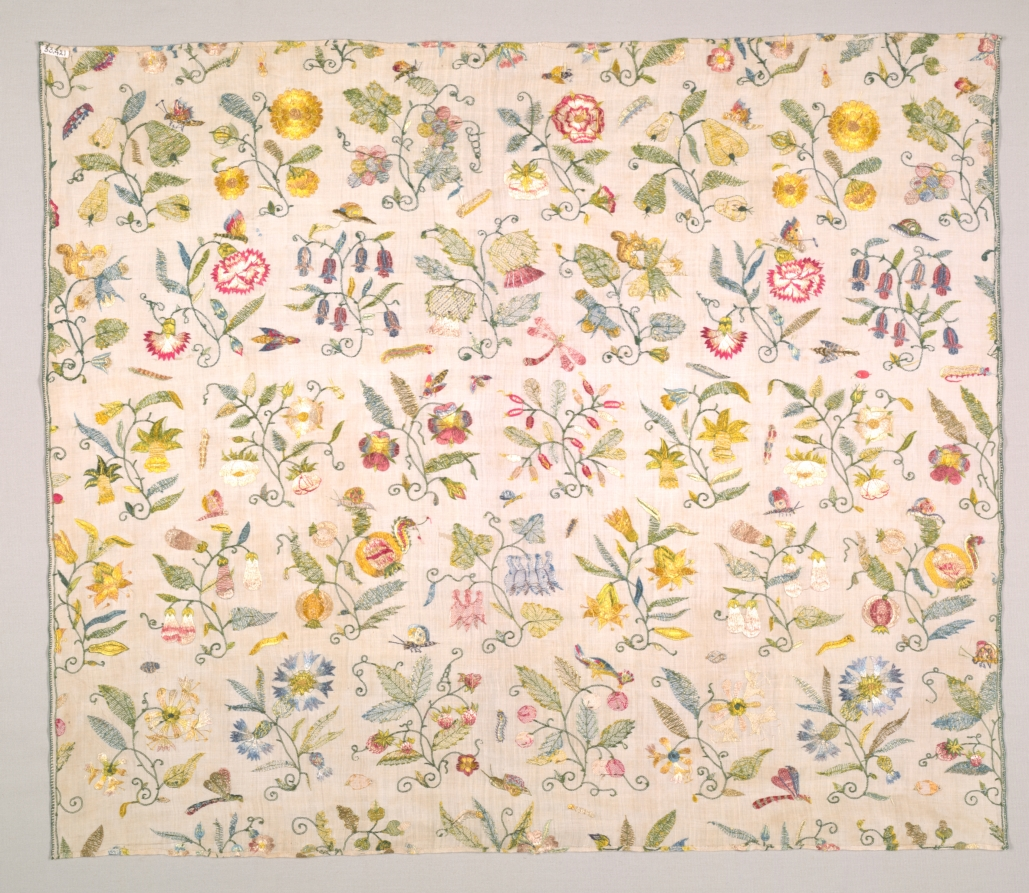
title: Floral Panel, Probably from a Curtain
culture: England, James I Period, early 17th century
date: early 1600s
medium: Silk, linen; plain weave, embroidery: couch and stem stitches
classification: Embroidery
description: Natural forms and brilliant colors of silk thread radiate in this embroidery. The refined floral sprays are offset in successive rows and repeated every sixth row. Flies, moths, and other insects are scattered among them, and a seated squirrel eats a hazelnut. The profusion of flowers and plants, such as thistles, hazelnuts, and foxgloves, were probably copied from pattern books that were increasingly available to embroiderers. Only a master embroiderer could have created such splendor evidenced here.